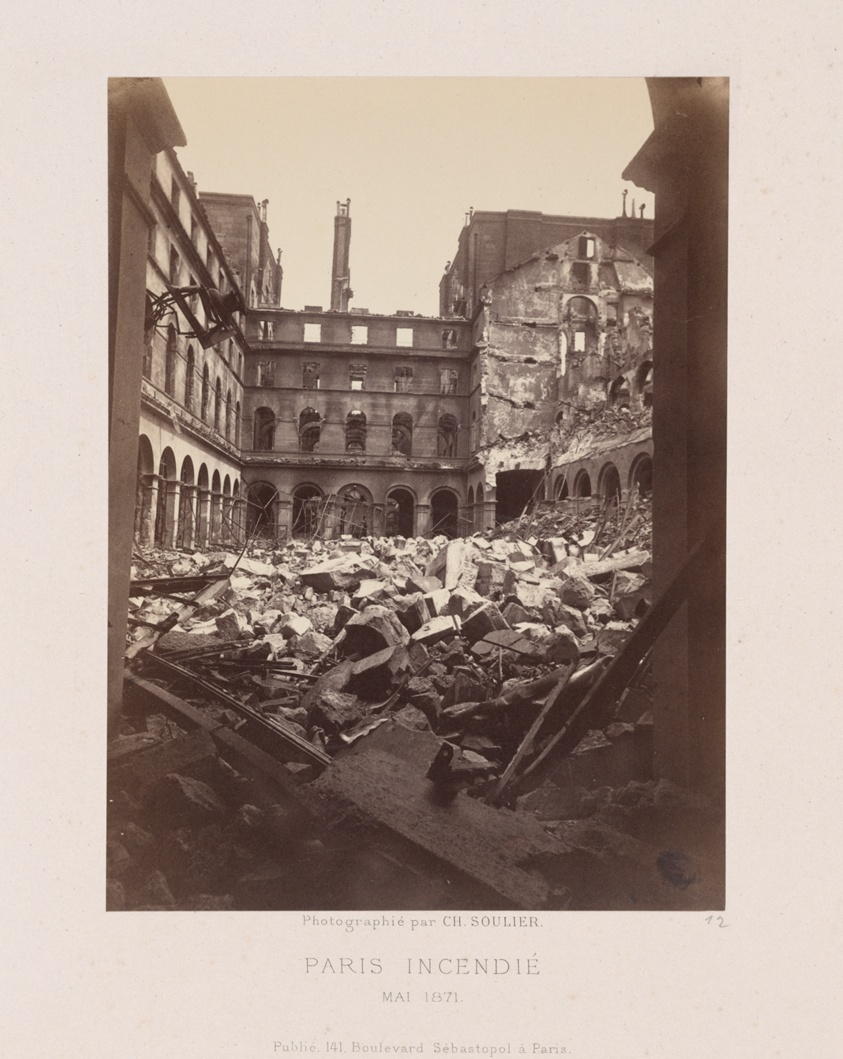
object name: Photograph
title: Paris Fire (Interior of the Ministry of Finance), from the series "Paris Incendié"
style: 19th century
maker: Charles Soulier (French, 1840–1875)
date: May 1871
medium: Albumen print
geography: France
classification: gelatin silver (developing-out-paper) pr; photographic process; photography; photograph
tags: Collected by Hugh Edwards, Paris